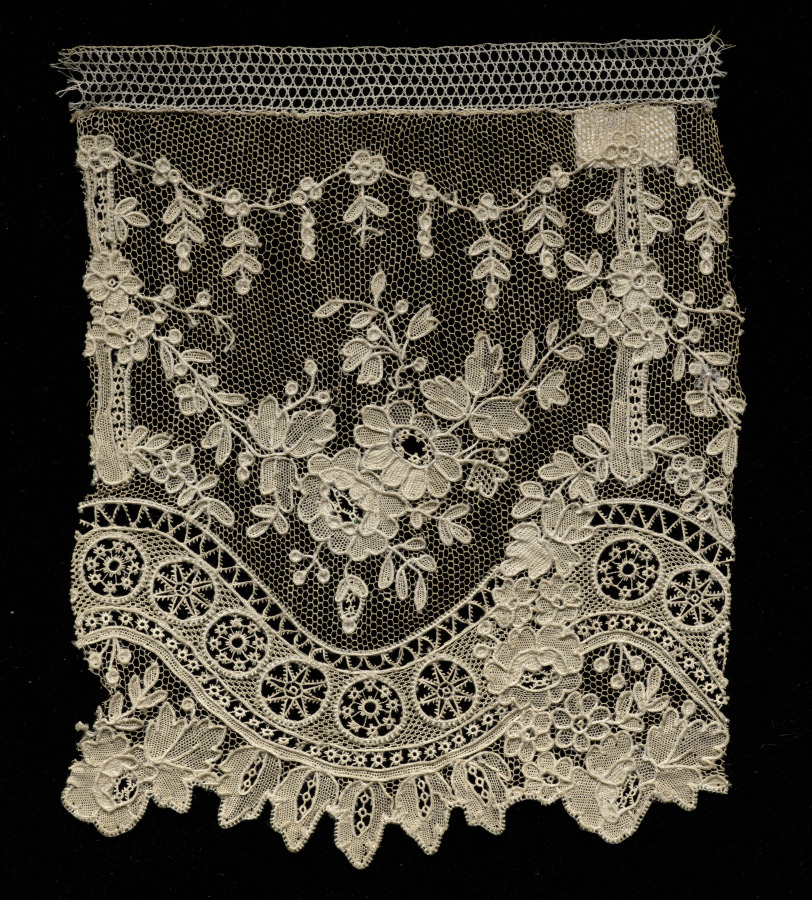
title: Lace Edging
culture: France, Alençon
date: 1900–1935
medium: Linen: needle lace (Point d'Alençon)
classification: Lace